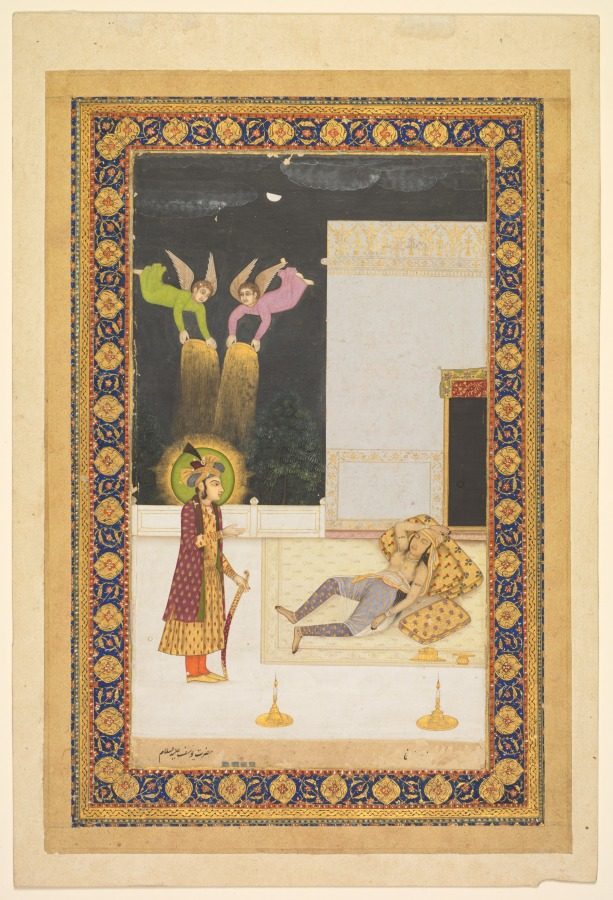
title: The Dream of Zuleykha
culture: India, Lucknow, Mughal, 18th century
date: c. 1770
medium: Gum tempera and gold on paper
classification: Painting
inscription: verso: inscribed at lower left: Hazrat Yusuf alayhi al - salaam ("the prophet Joseph on him be peace")